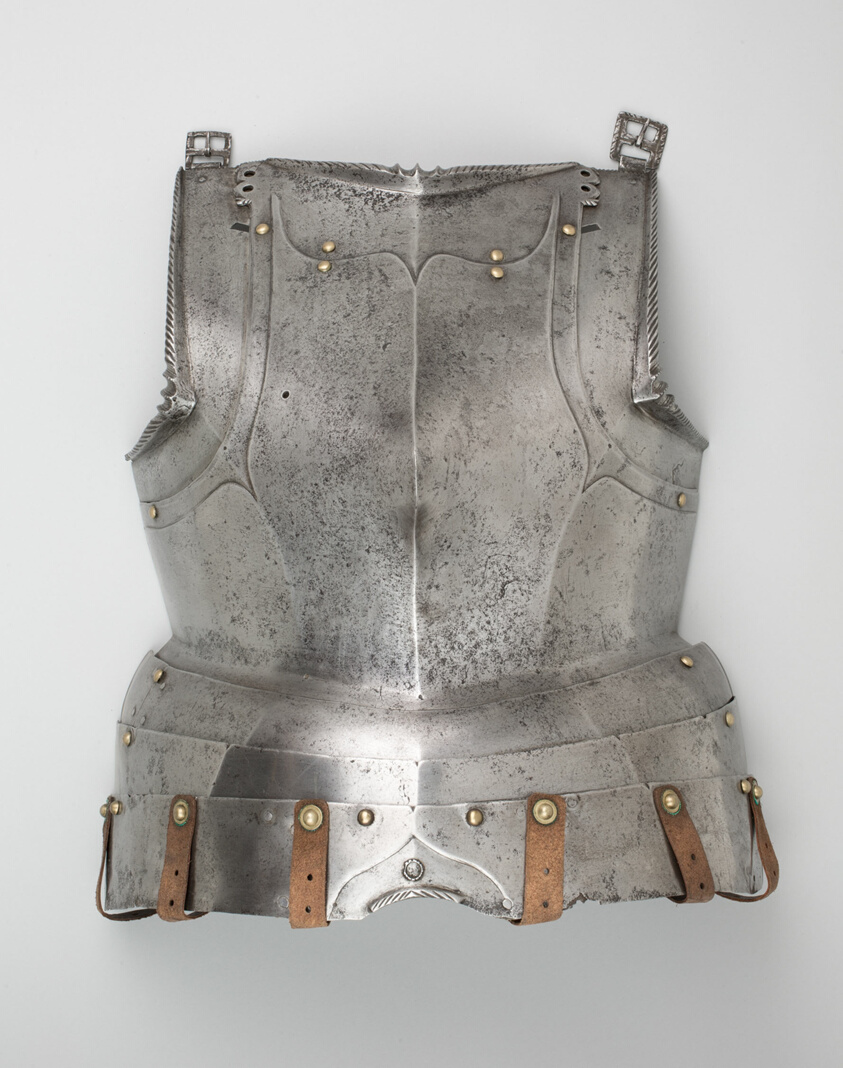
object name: Armor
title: Breastplate with Associated Fauld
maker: Northern German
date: c. 1570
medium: Steel and leather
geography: Northern Germany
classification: suit-element; armor; arms and armor